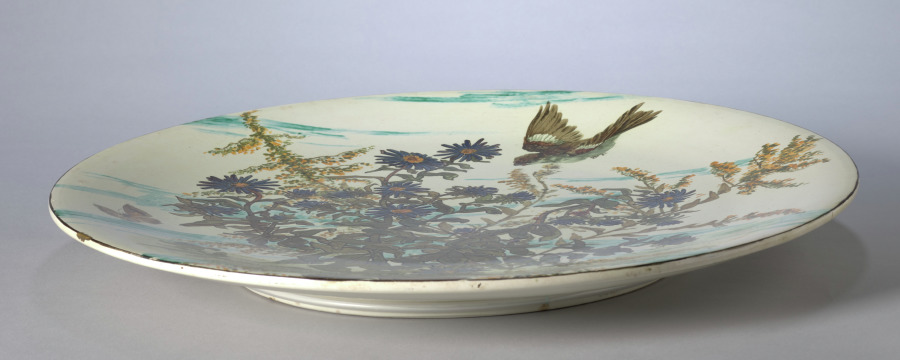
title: Plaque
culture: America, New York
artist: John Bennett (American, 1840–1907)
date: 1879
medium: earthenware with underglaze painted decoration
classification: Ceramic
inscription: inscription in black on bottom: "JB [in monogram] ENNETT/ 412 E 24/ N.Y./ 1879."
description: John Bennett was trained in England. He seems to have played a crucial role there by introducing painted decoration on ceramics at the Doulton factory in the early 1870s. Although they admired his talent, his English colleagues found Bennett had a difficult personality, and his stay at the Doulton factory was brief. By 1876 he was in New York, bringing with him the concepts of the English Aesthetic Movement: muted colors and great naturalism in the depiction of birds and flowers.